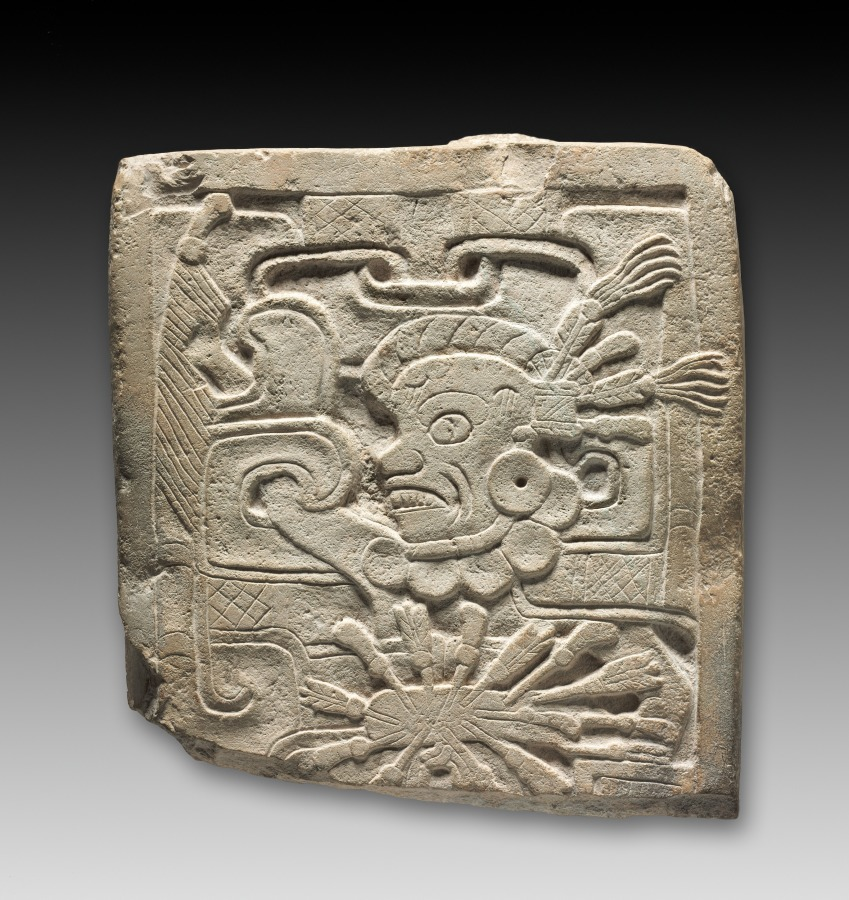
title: Stela Fragment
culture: Mexico, Veracruz?, 600-950 AD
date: 600–950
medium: limestone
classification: Sculpture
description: Figures appear on two sides of this fragmentary stela (upright stone slab carved in relief). One seems to represent a grimacing warrior who brandishes a club; arrow-like darts festoon his belt and hair. On the other side is a skeleton with one fleshed hand, perhaps a sacrificed captive. The eagle with a leaf in its mouth is a hieroglyph that may identify the captive's name.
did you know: The pointed teeth of the warrior are suggestive of dental modification, a practice known to have occurred from human remains.